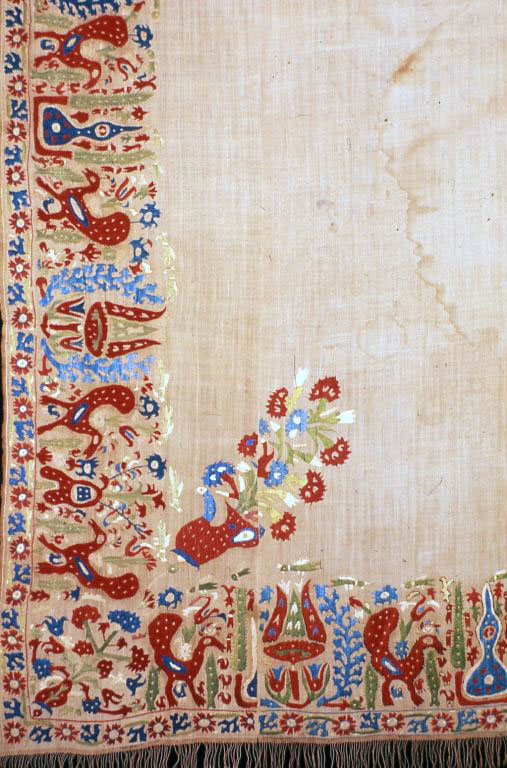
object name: Textile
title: Bedcover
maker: Greece, Ionian Islands or Epirus Province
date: 17th century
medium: Linen, plain weave; embroidered with silk in back, chain, split, and stem stitches; plied warp fringe; four loom widths joined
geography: Greece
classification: textile; needlework (visual works)